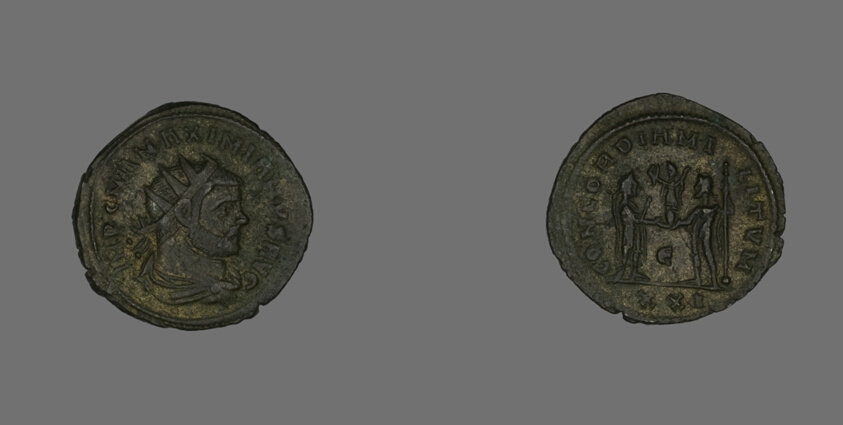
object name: Coin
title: Antoninianus (Coin) Portraying Emperor Marcus Aurelius Valerius Maximianus (Maximian or Maximianus I)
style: roman (ancient, style or period), ancient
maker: Roman, minted in Cyzicus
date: about 293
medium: Bronze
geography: Roman Empire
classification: coin; ancient art